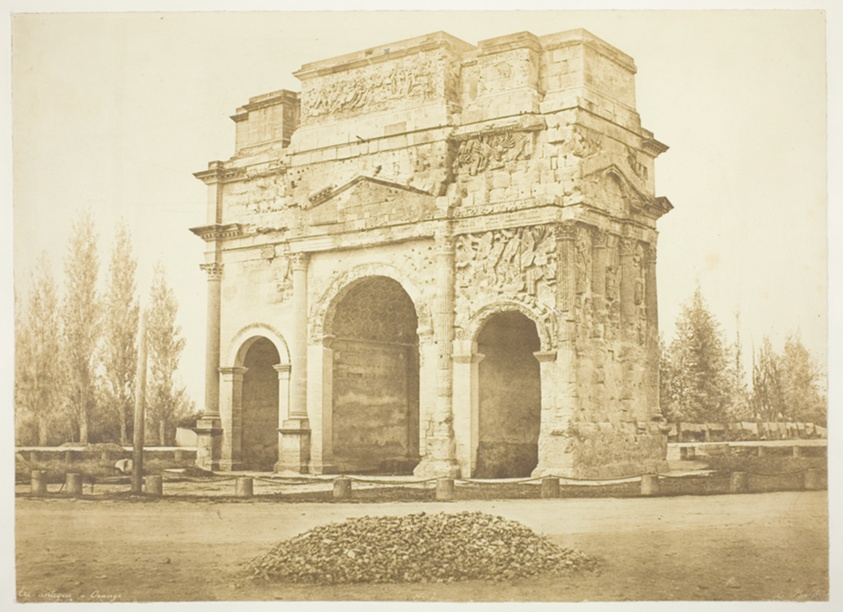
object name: Photograph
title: Arc Antique a Orange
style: 19th century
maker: Édouard Baldus; French, born Germany, 1813–1889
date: 1853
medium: Albumen print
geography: France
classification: albumen silver print; photographic process; photography; photograph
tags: documentary